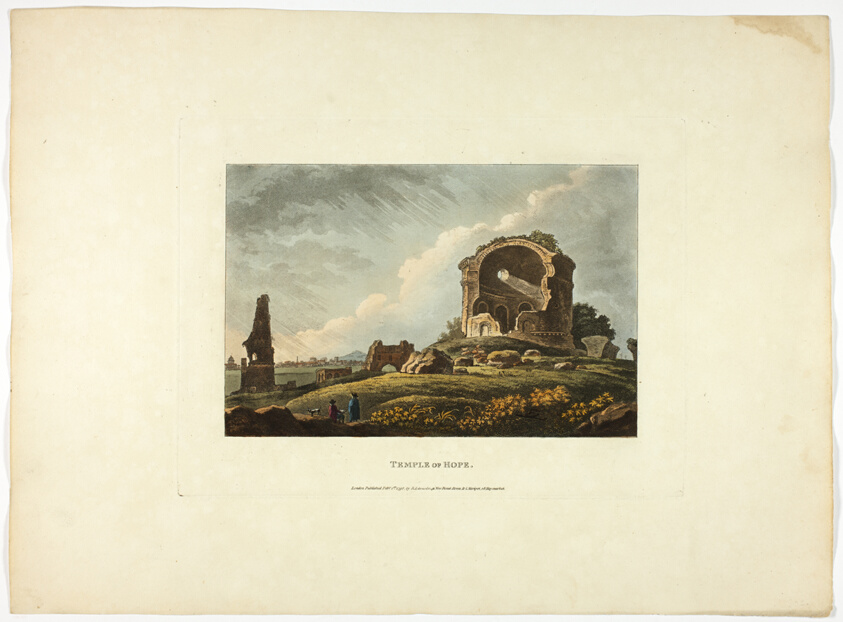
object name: Print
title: Temple of Hope, plate twenty-four from the Ruins of Rome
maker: M. Dubourg, (English, active 1786-1838); published by J. Merigot (Italian, Unknown)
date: published February 1, 1798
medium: Hand-colored aquatint on paper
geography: England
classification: aquatint; print; prints and drawing